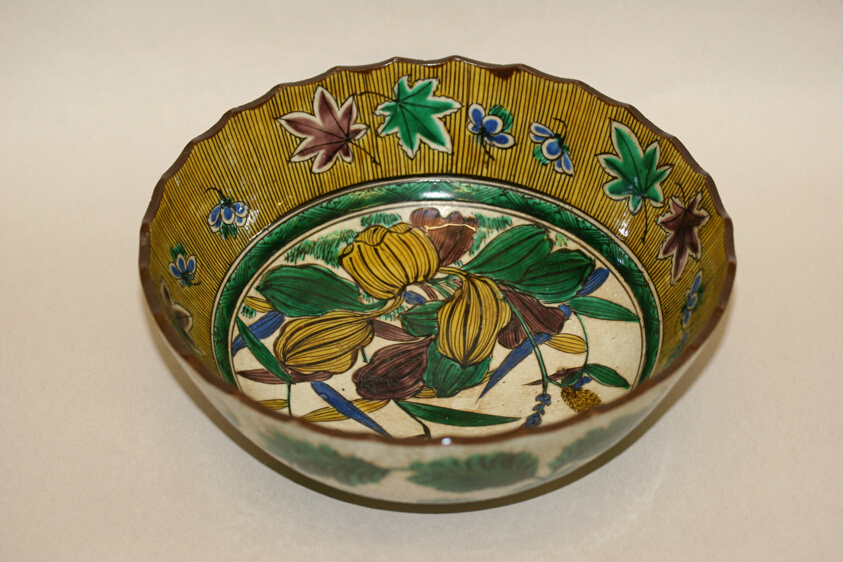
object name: Decorative Arts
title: Kutani-Style Sweets Tray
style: Japanese (culture or style)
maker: Japan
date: c. 1825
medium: Porcelain with underglaze decoration and overglaze enamels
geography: Japan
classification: stoneware; asian art; ceramics; decorative arts